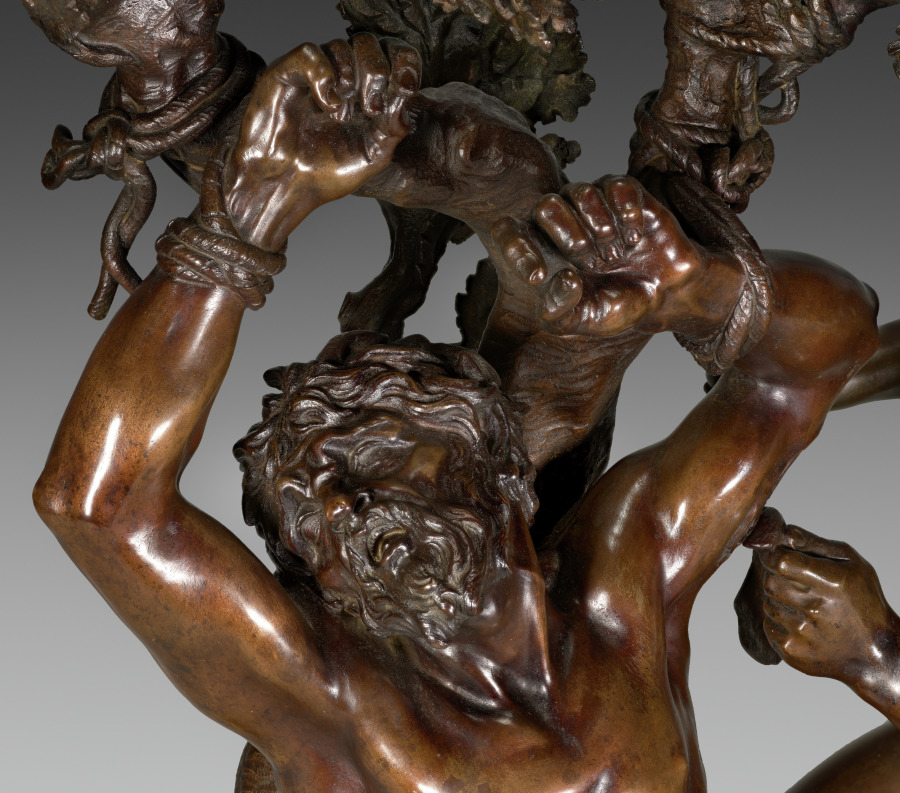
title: Apollo Flaying Marsyas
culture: Italy, Florence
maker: Giovanni Battista Foggini (Italian, 1652–1725)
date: c. 1691–1700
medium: Bronze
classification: Sculpture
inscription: 1136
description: According to myth, the overconfident satyr (half-goat, half-man) Marsyas challenged Apollo, god of the arts, to a musical duel. The defeated Marsyas was tied to a tree and skinned alive in punishment for his pride. Foggini’s bronze captures the moment after Apollo’s victory as the bound Marsyas cries out in agony while the god makes the first incision. The satyr’s anguish is echoed by the gnarled branches; Apollo’s wrath is manifested in his billowing drapery.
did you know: The lyre with which Apollo outperformed Marsyas can be seen between his feet, cast down upon his victory.